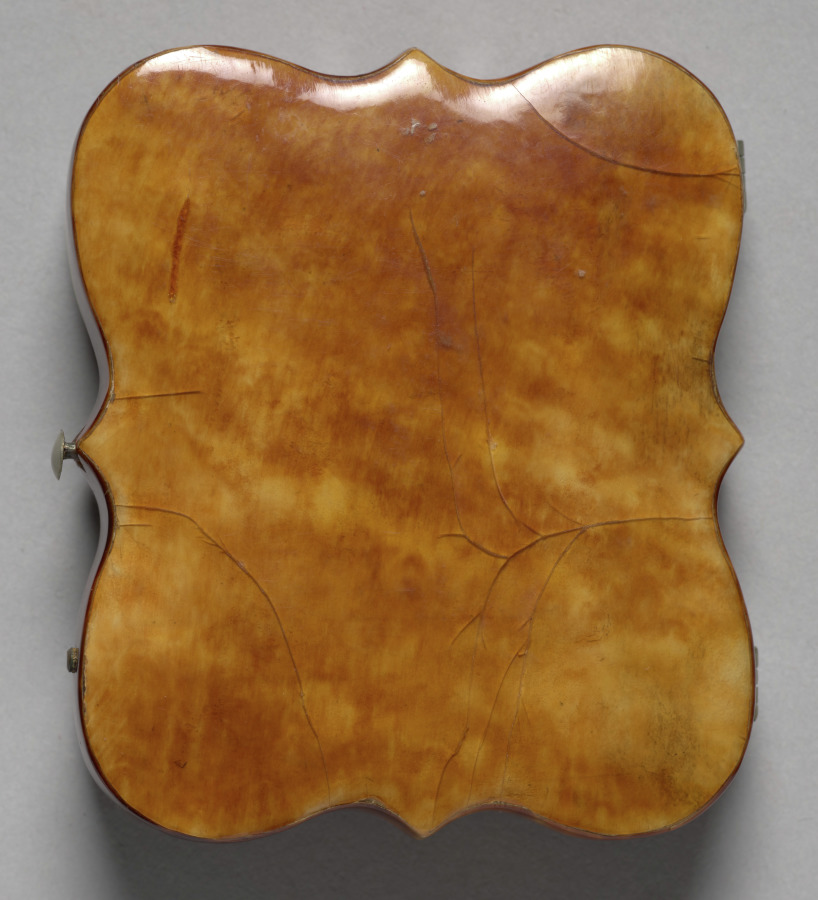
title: Woman with elaborate nautical backdrop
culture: America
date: c. 1860–65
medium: ambrotype, tinted, ninth plate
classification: Photograph